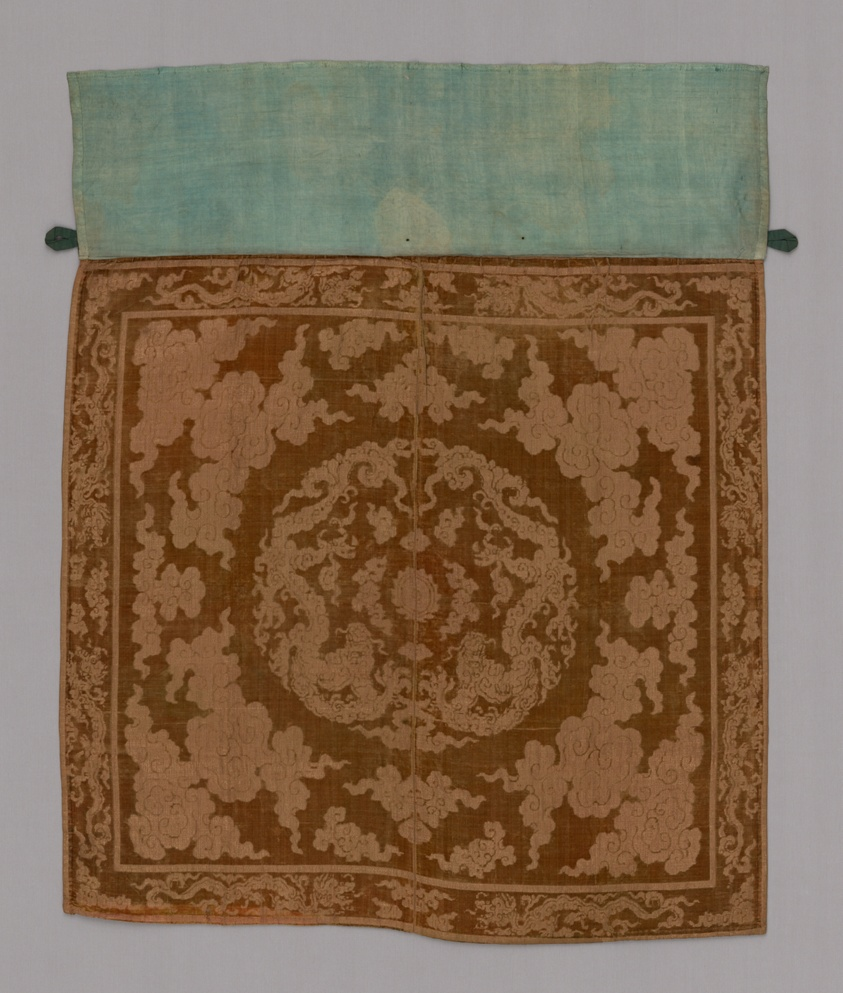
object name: Textile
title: Panel (Furnishing Fabric)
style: qing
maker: China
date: Qing dynasty (1644–1911), 1850/1900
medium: brocade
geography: China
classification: textile; weaving - velvet; weaving; furnishing textile